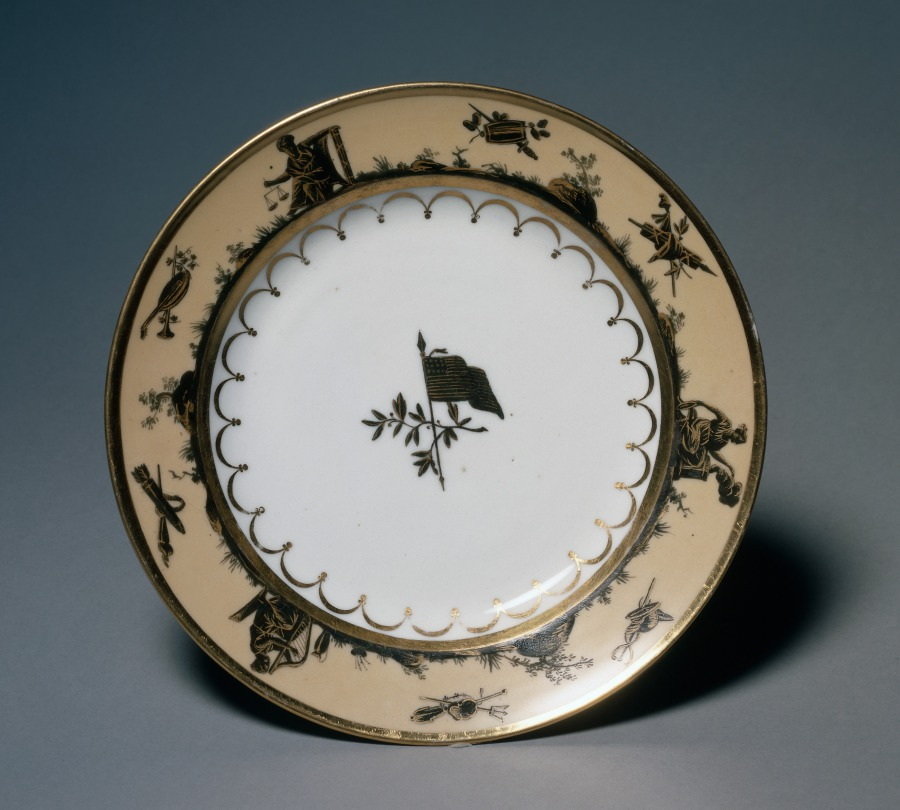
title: Dinner Plate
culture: France, Paris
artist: probably by Guérhard et Dihl (French)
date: c.1805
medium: porcelain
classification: Ceramic